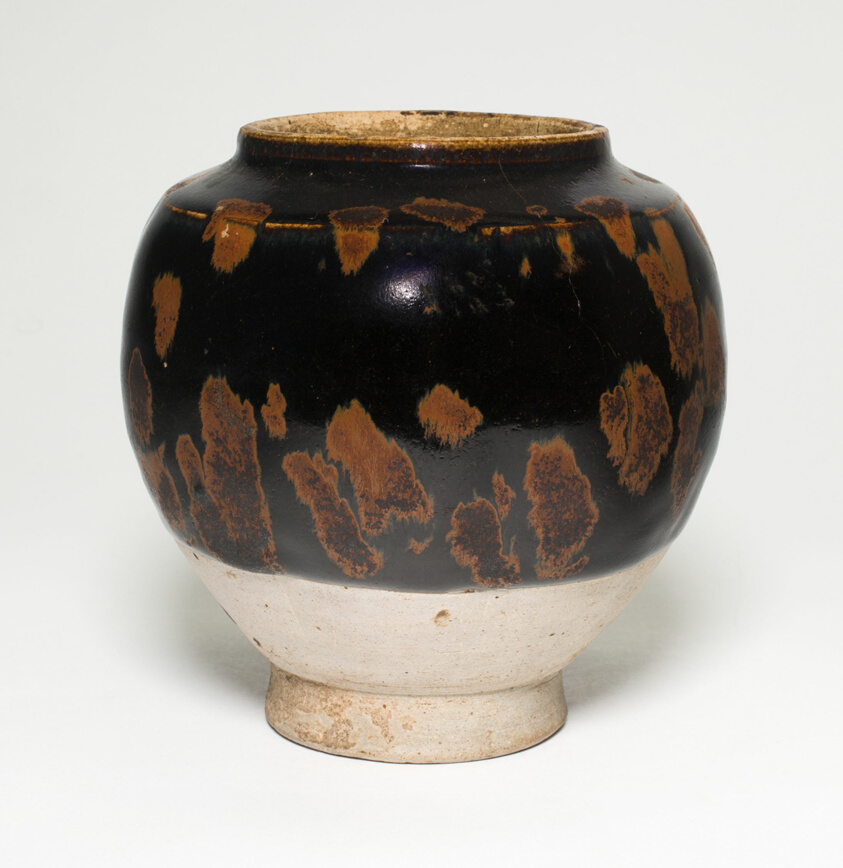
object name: Vessel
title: Jar with Partridge-Feather Mottles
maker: China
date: Jin dynasty (1115-1234)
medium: Stoneware with iron black glaze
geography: Henan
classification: stoneware; asian art; ceramics